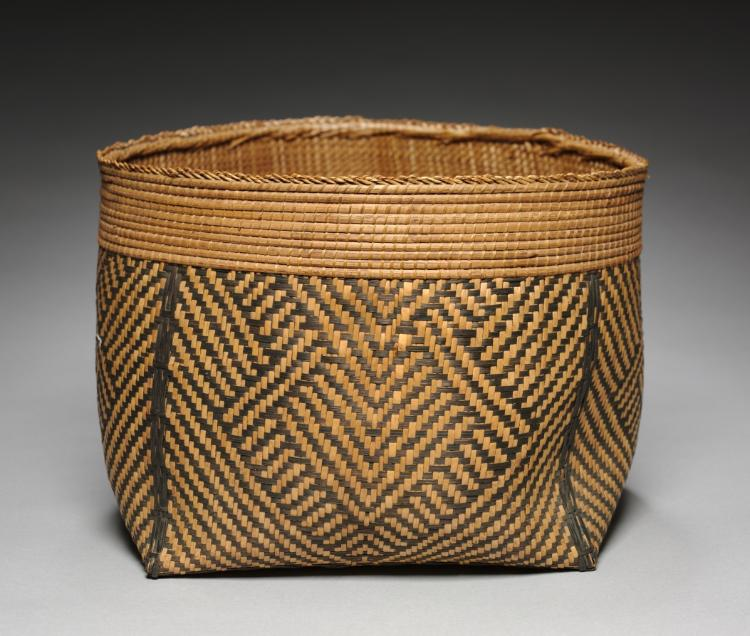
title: Basket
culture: Africa, Central Africa, Democratic Republic of the Congo, Mangbetu-style maker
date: by 1928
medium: Plant fibers and dye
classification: Basketry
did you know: This woven hat looks brand new because it was one of the many items the business-savvy chief of Ekibondo had artists and artisans make for the foreigners who passed through his village.